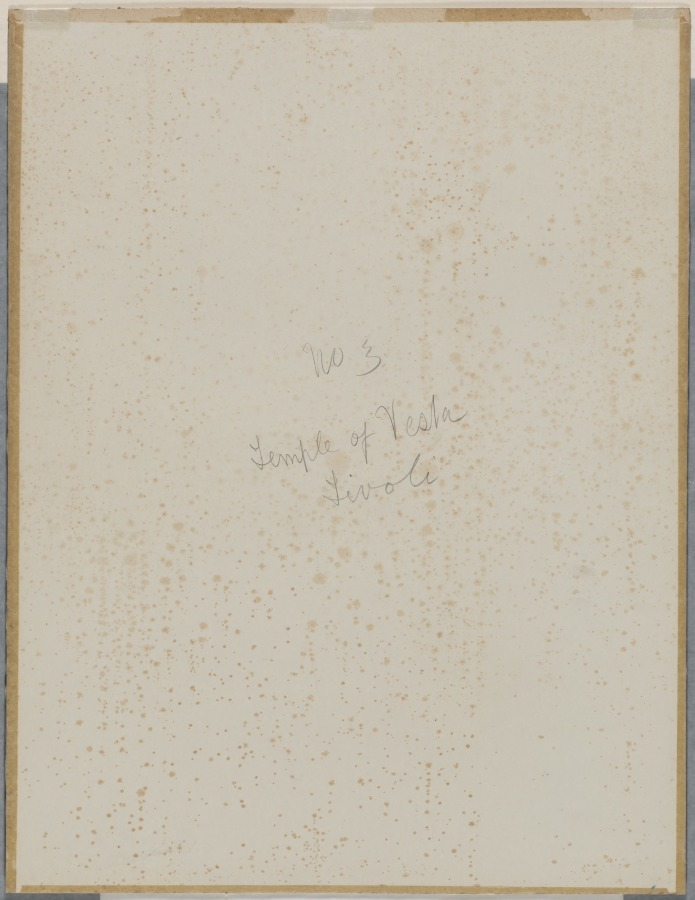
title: The Temple of Vesta and the Falls at Tivoli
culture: England, 19th century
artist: William Callow (British, 1812–1908)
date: 1859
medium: watercolor with gouache and graphite underdrawing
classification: Drawing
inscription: Signed and dated, at lower left, in dark brown wash: William Callow / 1859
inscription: inscribed on backing board (in a modern hand): No. 3 / Temple of Vesta / Tivoli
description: A meticulously finished, grand-scale presentation watercolor, this drawing was exhibited in 1859 at the Society of Painters in Water Colours in London. The view was taken from a low vantage point, foregrounding closely observed, moss-covered rocks amid the frothy cascade. Jewel-like, the Temple of Vesta surmounts the imposing cliff, gleaming white against a crisp, blue sky. The majesty of the view is underscored by the presence of nearly imperceptible figures in the far distance hanging linens to dry along the temple wall.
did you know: William Callow likely based the view seen in this drawing on sketches made during his first trip to Italy in 1840.